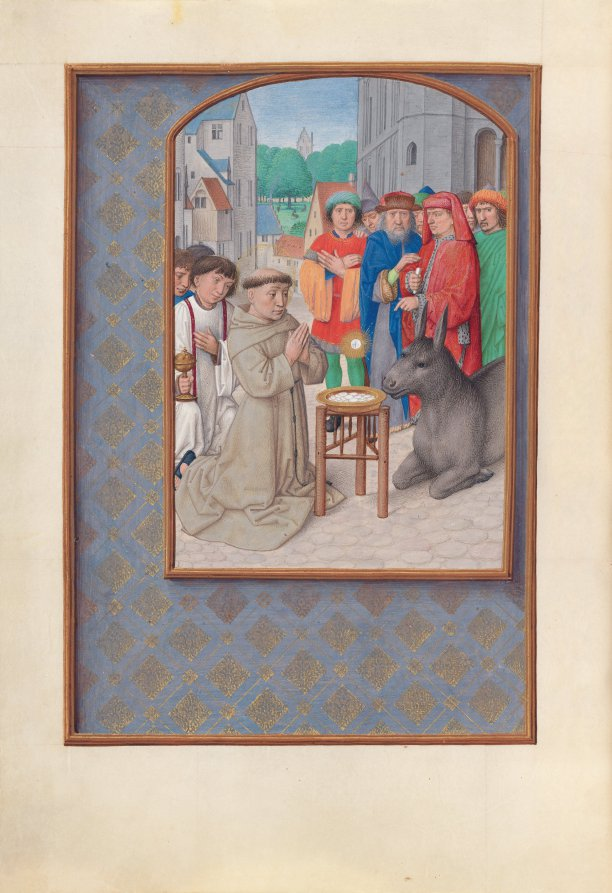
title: Hours of Queen Isabella the Catholic, Queen of Spain: Fol. 187v, St. Anthony of Padua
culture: Flanders, Ghent and Bruges, late 15th century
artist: Master of the First Prayerbook of Maximillian (Flemish, c. 1444–1519)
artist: and Associates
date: c. 1500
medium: ink, tempera, and gold on vellum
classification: Bound Volume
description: This manuscript was illuminated by a circle of at least five highly organized manuscript painters active in the Flemish cities of Ghent and Bruges. The principal illuminator was Alexander Bening, who painted the majority of the book's miniatures. Manuscripts produced by this circle of artists are renowned for the decoration of their borders, which typically feature a rich variety of realistically-painted flowers, birds, and butterflies. This prayer book, called a book of hours, was intended not for a cleric, but for the private devotions of a lay person-in this case, Isabella the Catholic, Queen of Spain (1451-1504). Isabella's coat of arms embellishes the book's frontispiece. It is unlikely that the book was commissioned by the Queen herself; rather, she probably received it as a diplomatic gift from someone courting her patronage, perhaps Cardinal Francisco Jimenez de Cisneros. A Franciscan friar, Jimenez was dependent upon Isabella for his advancement, first to the post of Queen's confessor in 1492, and then to Archbishop of Toledo in 1495.